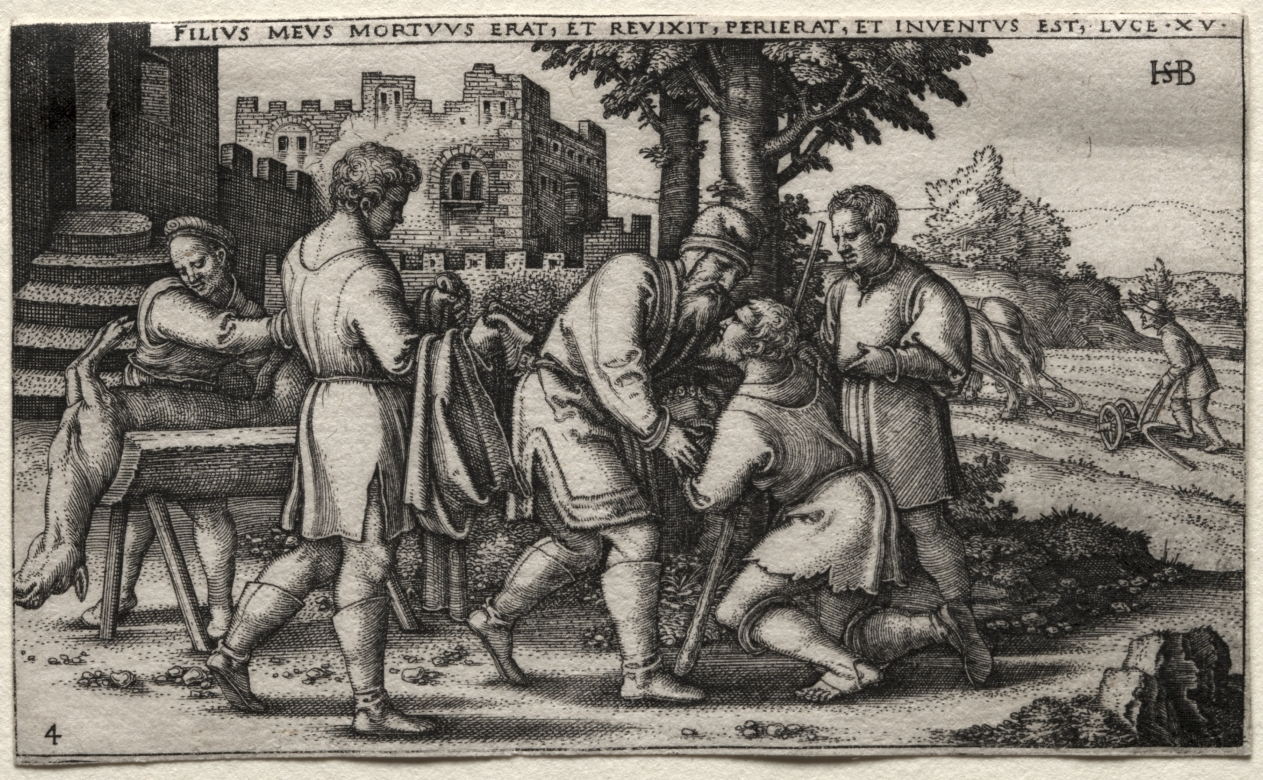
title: The Prodigal Son: Return of the Prodigal Son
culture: Germany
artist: Hans Sebald Beham (German, 1500–1550)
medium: engraving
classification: Print